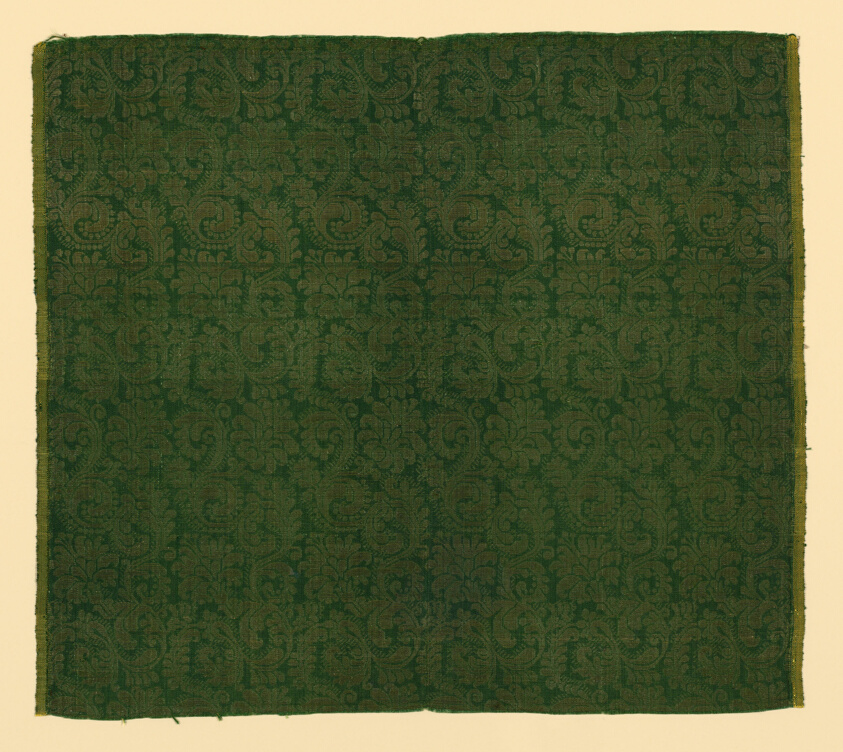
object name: Textile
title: Panel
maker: Italy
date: 17th century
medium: Silk and gold gilt strip, warp-faced (weft rib) plain weave with supplementary patterning wefts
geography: Italy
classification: textile; weaving